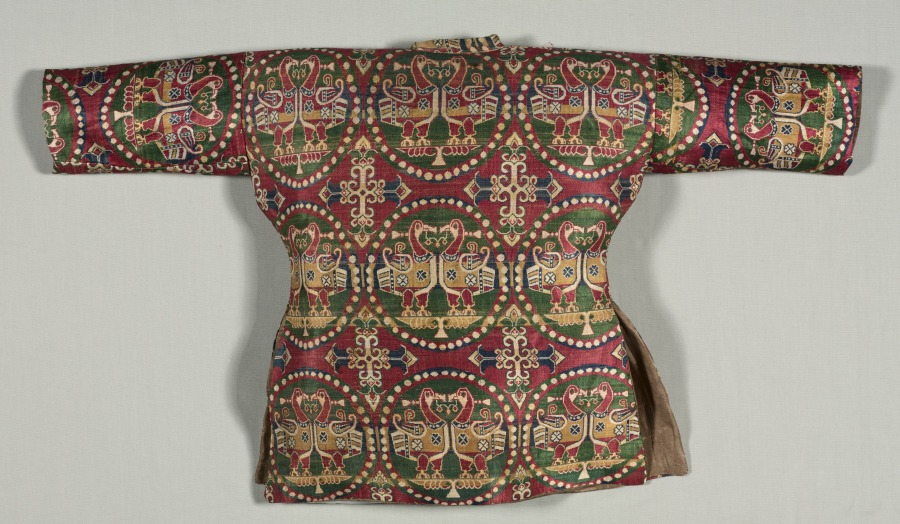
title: Child’s Coat with Ducks in Pearl Medallions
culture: Probably Sogdia (present-day Uzbekistan); China, Tang dynasty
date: 700s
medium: Silk: weft-faced compound twill weave (samite)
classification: Garment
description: The coat’s outer fabric is woven in five brilliant colors featuring paired ducks in pearl roundels, hallmarks of the precious and highly desired silks from Sogdia. The coat’s inner lining is a twill damask with a floral pattern made in China. The combination of Sogdian and Chinese silks in one garment with Tibetan ownership history is evidence of the vital exchange and cultural interaction among the peoples living along the trade routes of the Silk Road. This precious coat was presumably made for a Tibetan prince. Given the coat’s pristine condition, though, it is unclear whether the garment was ever worn, or was used as a diplomatic gift or perhaps as currency.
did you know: This coat is part of a set of garments that originally included an outer pair of pants and silk boots made from the same fabric.